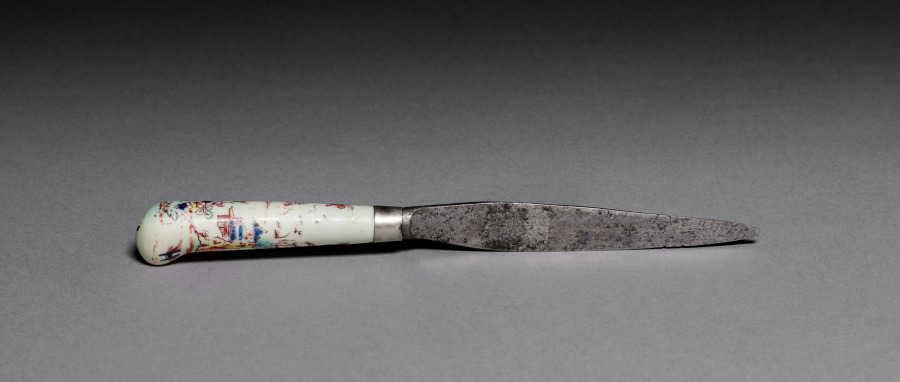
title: Knife Handle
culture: France, 18th century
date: 1725–1750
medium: soft paste porcelain, steel blade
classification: Ceramic